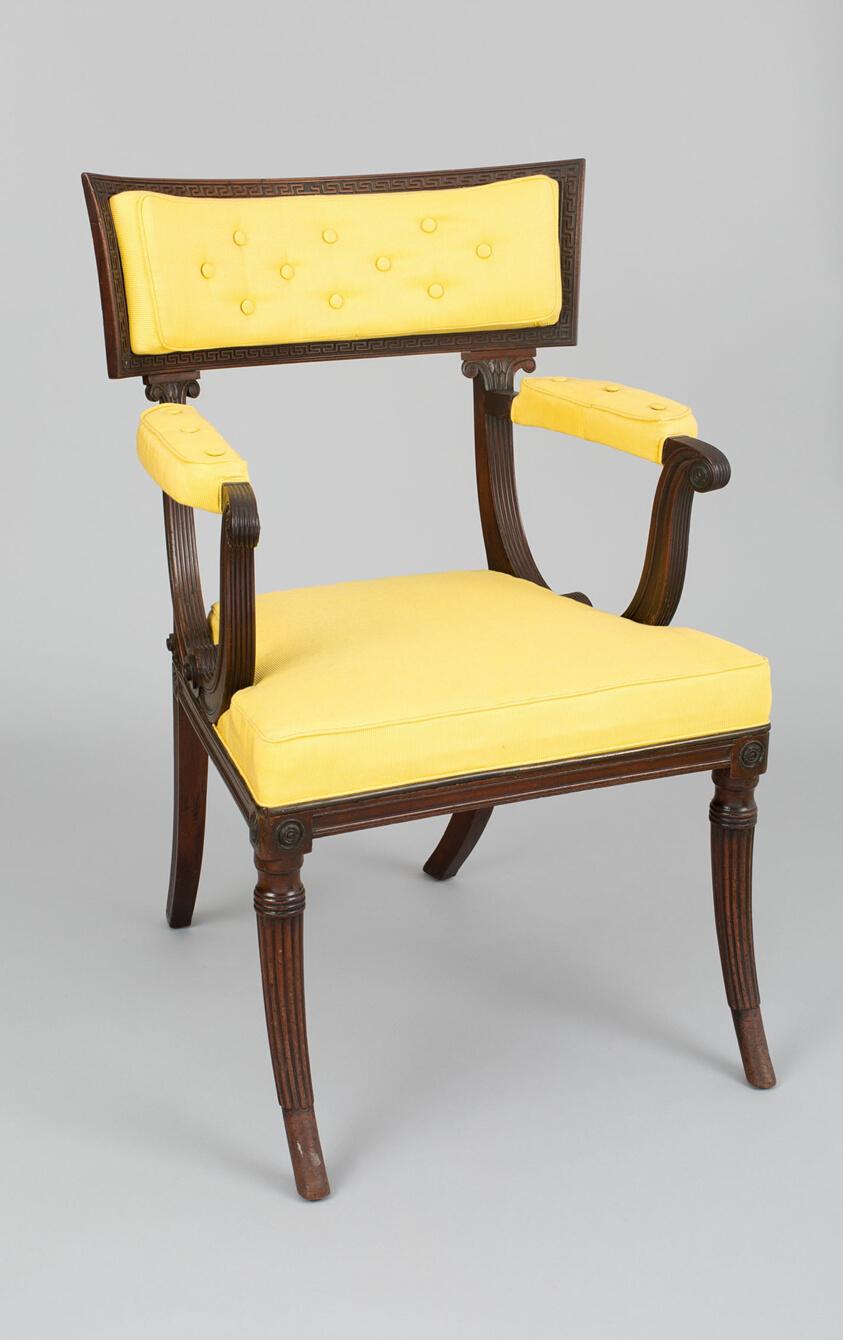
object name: Furniture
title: Armchair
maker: England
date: c. 1810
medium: Carved mahogany, modern upholstery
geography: England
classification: seating; furniture; european decorative arts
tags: furniture